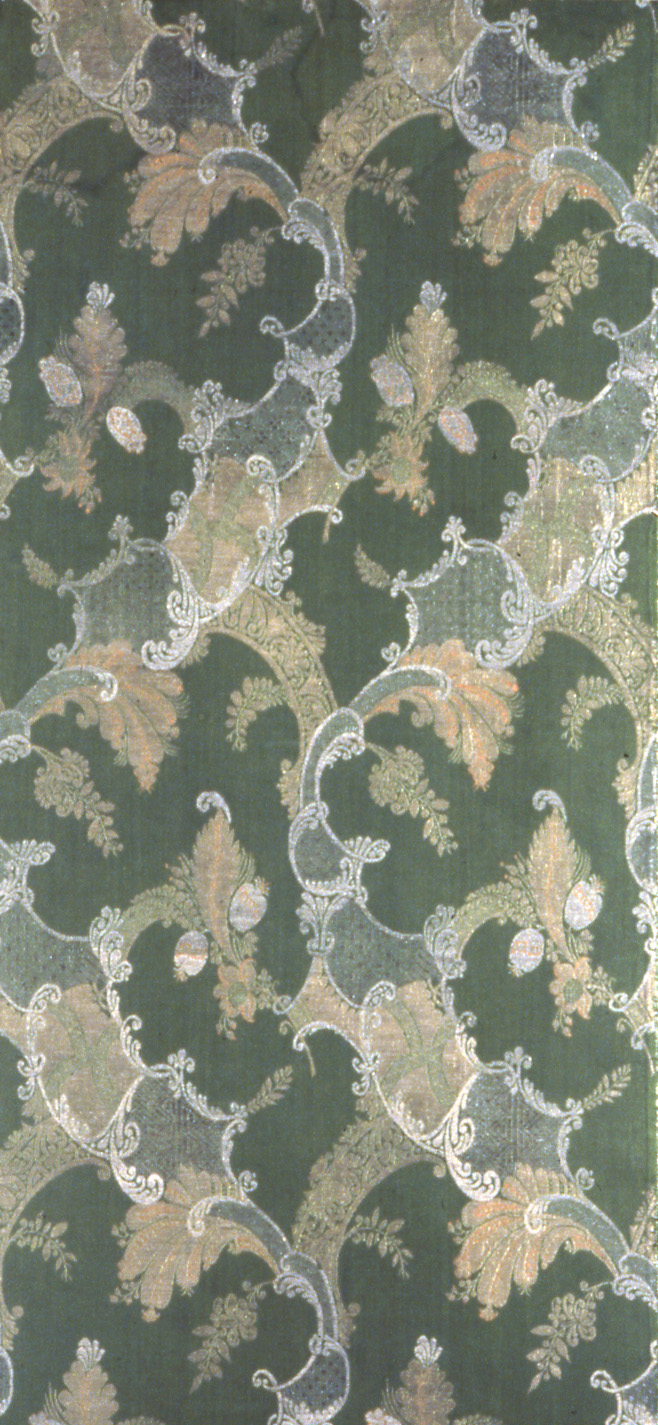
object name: Textile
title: Panel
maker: Probably France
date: 1711/13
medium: Silk and silvered-and-gilt-metal-strip-wrapped silk, warp-faced, weft-ribbed plain weave with secondary binding warps tying some supplementary brocading wefts in a 3:1 twill interlacing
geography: France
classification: textile; weaving